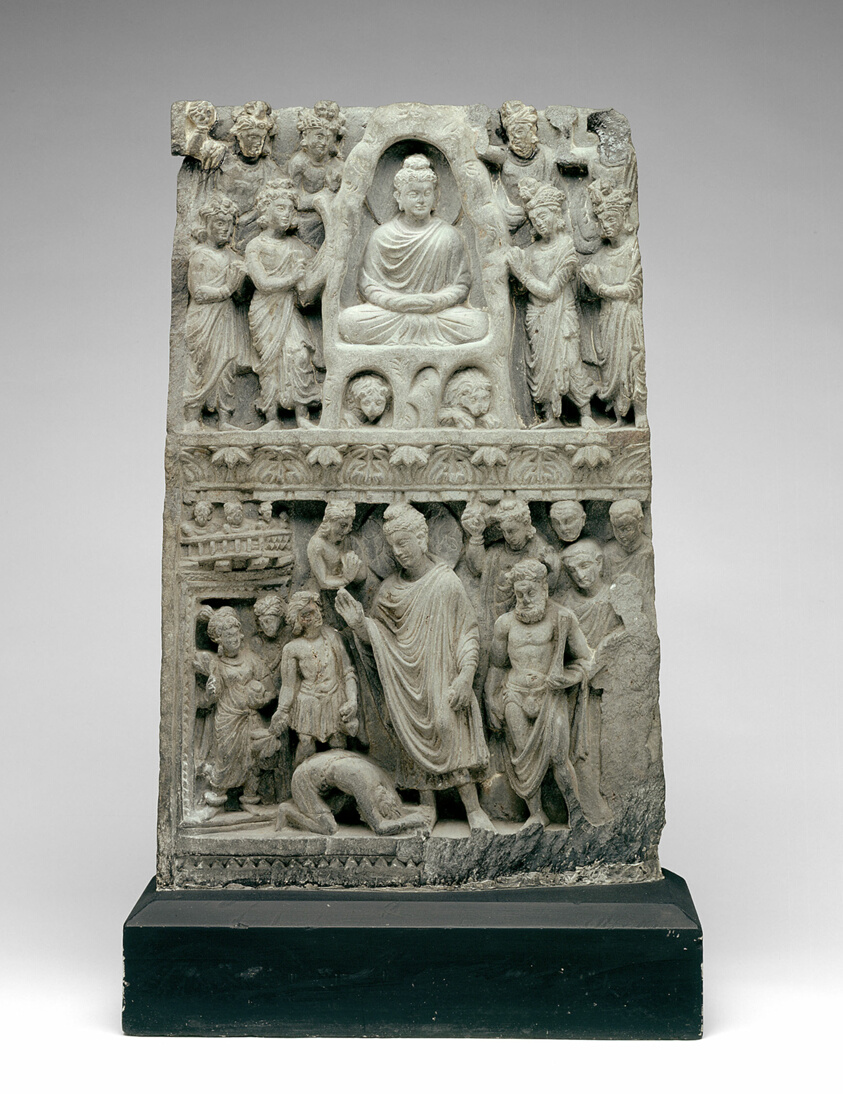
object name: Sculpture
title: Buddha Shakyamuni Meditating in the Indrashala Cave [top] and Buddha Dipankara [bottom]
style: South Asian, gandharan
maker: Pakistan; Ancient region of Gandhara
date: 2nd/3rd century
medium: Schist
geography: Gandhara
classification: sculpture; schist; stone; asian art